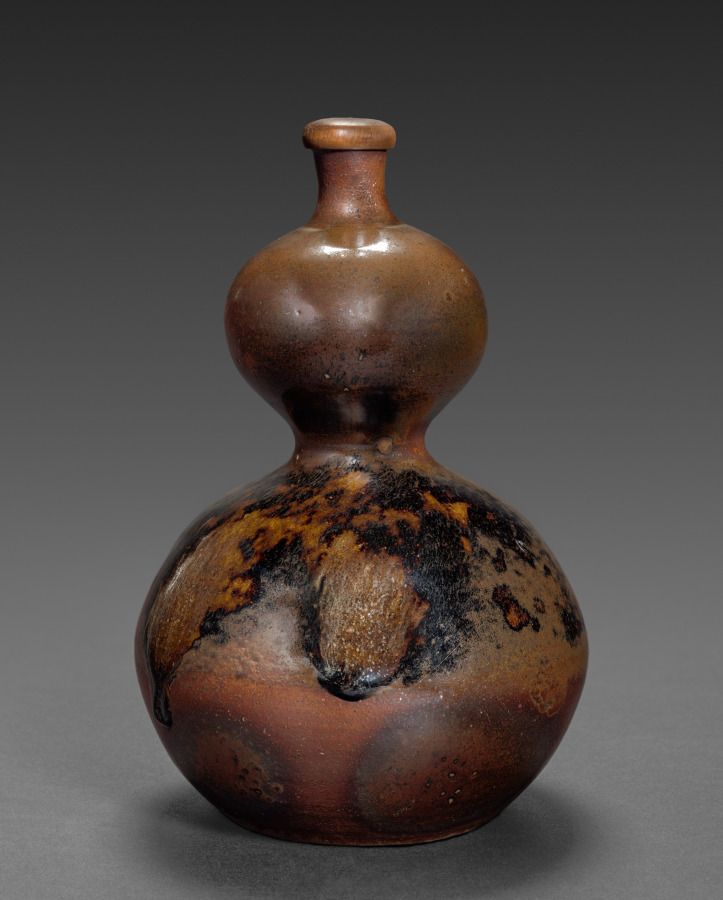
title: Double Gourd Jar with Wooden Stopple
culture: Japan, Edo period (1615–1868)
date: 1700s to mid-1800s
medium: stoneware (Bizen ware)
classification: Ceramic